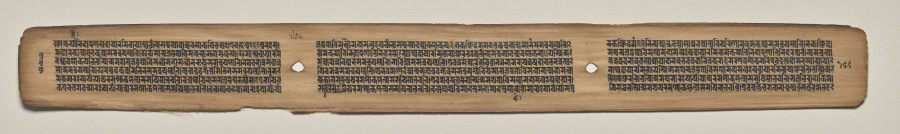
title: Text, folio 166 (verso), from a Manuscript of the Perfection of Wisdom in Eight Thousand Lines (Ashtasahasrika Prajnaparamita-sutra)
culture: Eastern India, Bihar, Vikramashila Monastery. Painting: Nepal, Kathmandu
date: Sunday, September 14, 1119 (year 239 of the Newar Samvat in the month of Ashvina)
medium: gum tempera and ink on palm leaves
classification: Painting